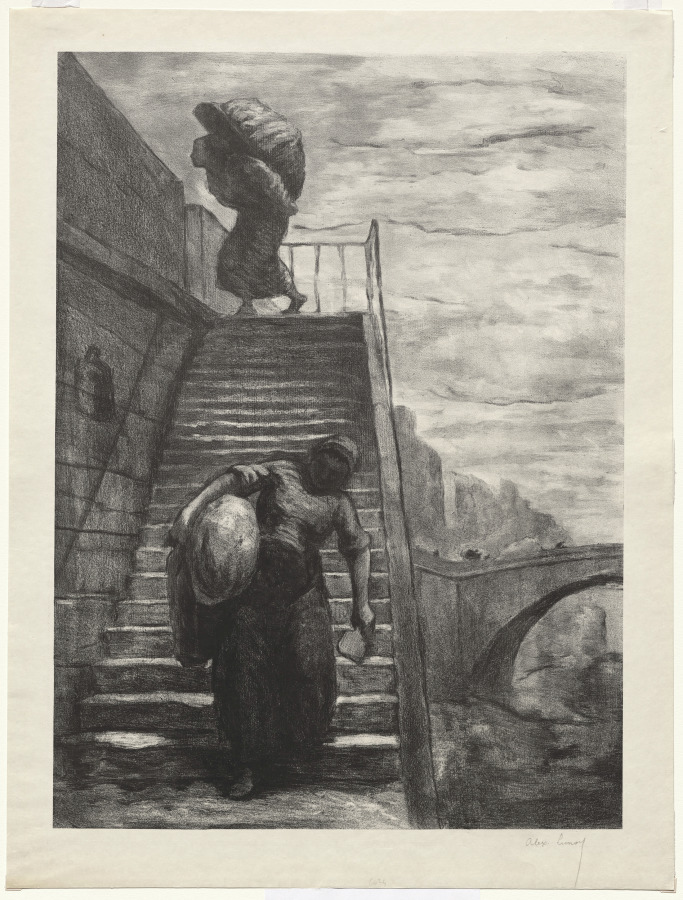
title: Washerwomen Descending a Quai Staircase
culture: France, 19th century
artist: Alexandre Lunois (French, 1863–1916)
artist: after Honoré Daumier (French, 1808–1879)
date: 1888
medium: transfer lithograph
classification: Print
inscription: signed, lower right, in pencil: Alex. Lunois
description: Alexandre Lunois worked extensively in lithography, a relatively recent invention during his time that was rarely used by artists, making both reproductive and original works. This print reinterprets Honoré Daumier’s Washerwomen of the Quai d’Anjou, an 1850 canvas depicting laundresses carrying heavy bundles on a staircase adjacent to Paris’s Seine River. Although Lunois worked closely from Daumier’s painting, he reinterpreted some details, such as the shadows on the woman’s face, emphasizing the strenuousness of her labor.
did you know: An impression of this print was selected for display at the prestigious annual exhibition of the Société des Artistes Français in 1888.